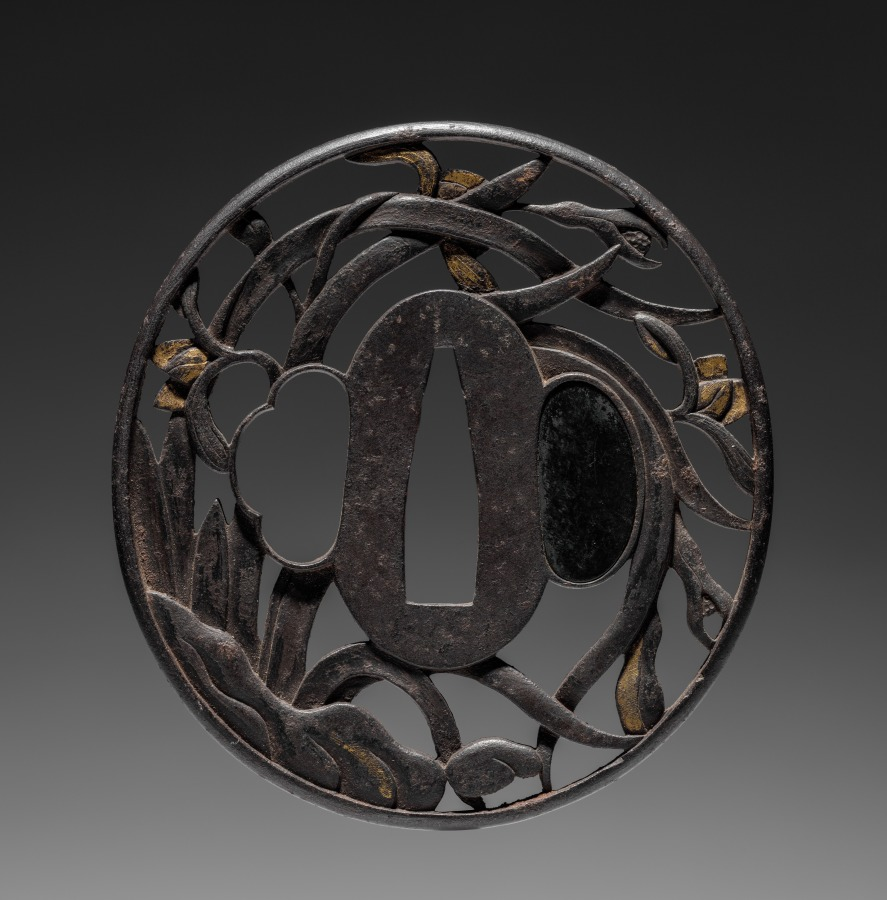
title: Sword Guard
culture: Japan, Edo period (1615–1868)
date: 1615–1868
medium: iron (Choshu type)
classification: Arms and Armor